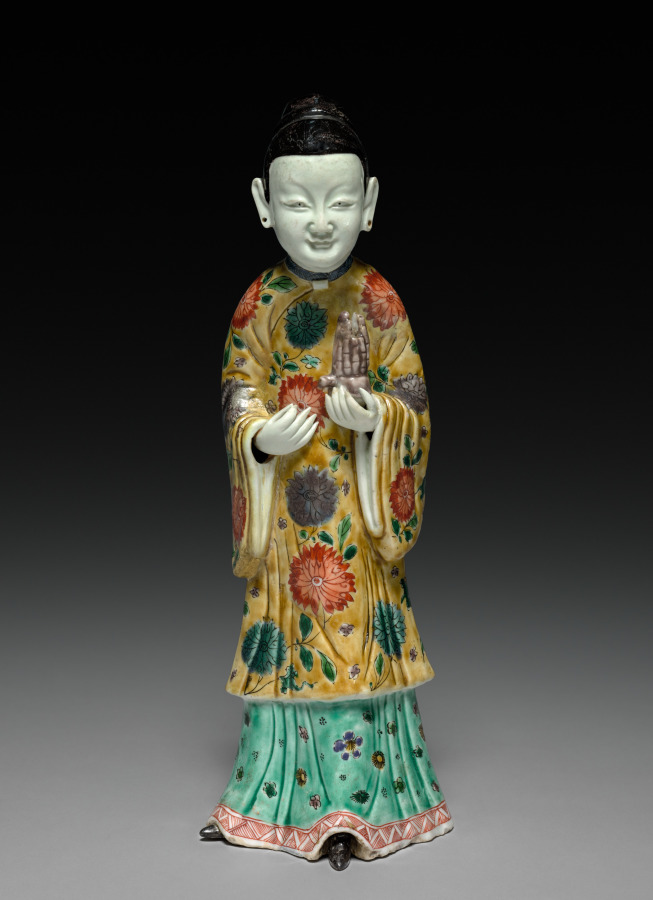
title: Court Lady Holding a Sheng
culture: China, Jiangxi province, Jingdezhen kilns, Qing dynasty (1644-1911), Kangxi reign (1662-1722)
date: 1662–1722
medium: porcelain with famille verte overglaze enamel decoration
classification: Ceramic